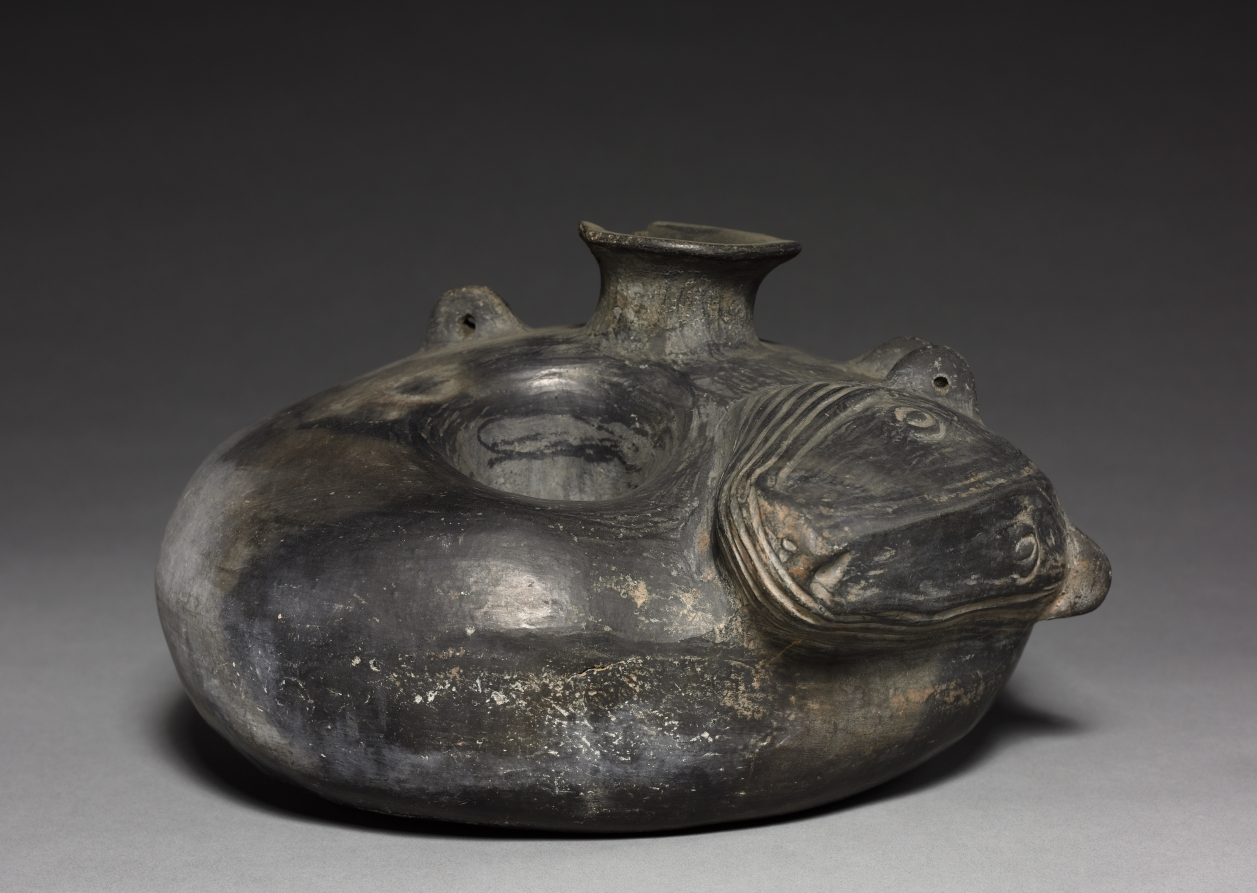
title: Bottle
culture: Peru, Chimú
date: 1300–1400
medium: pottery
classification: Ceramic